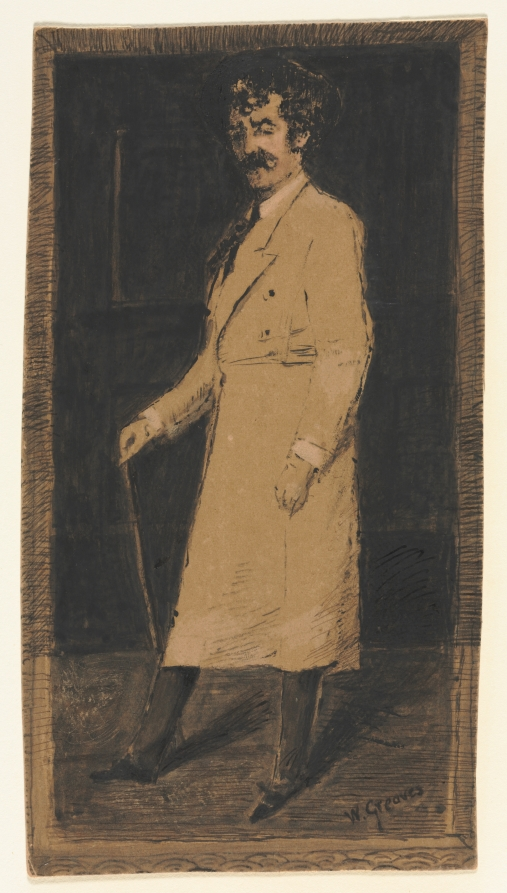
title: James McNeill Whistler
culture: England, 19th-20th century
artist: Walter Greaves (British, 1841–1930)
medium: pen and ink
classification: Drawing